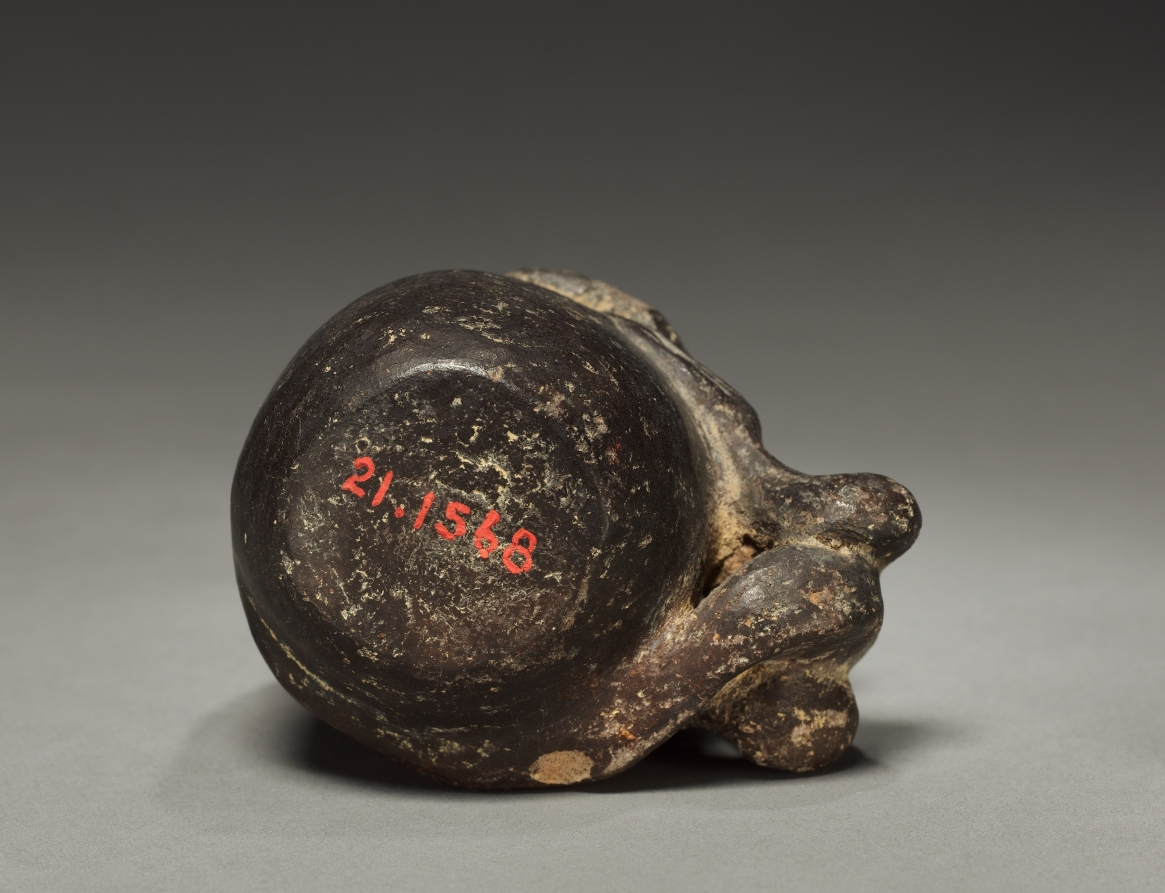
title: Jar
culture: Colombia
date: before 1921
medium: pottery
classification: Ceramic